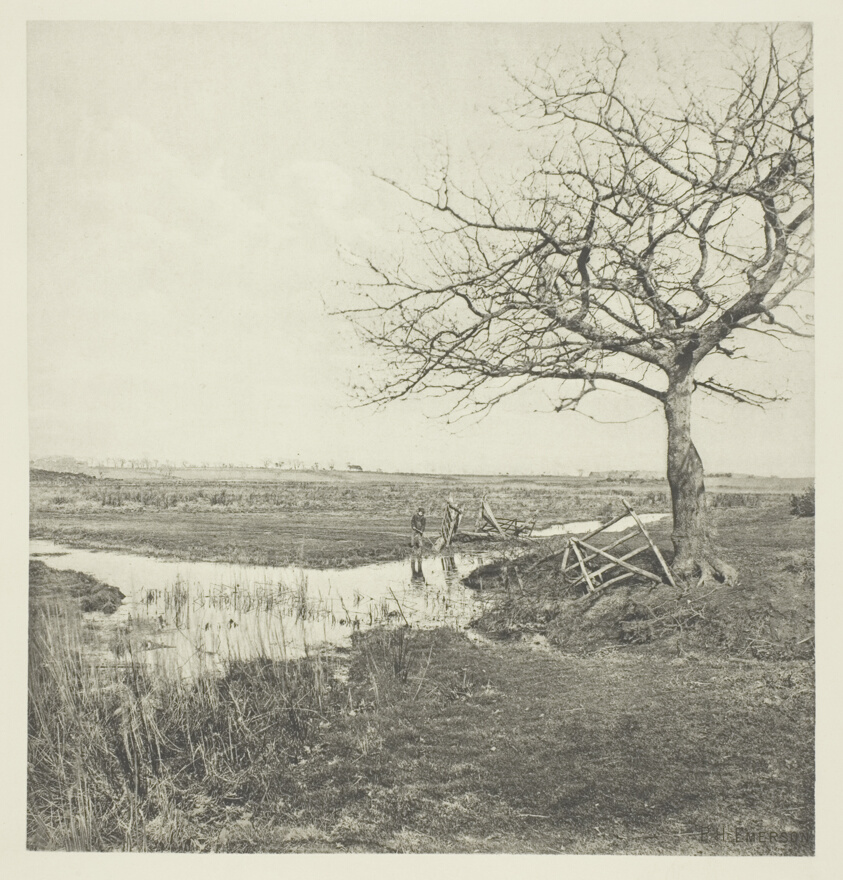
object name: Photograph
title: Leafless March (Suffolk)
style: 19th century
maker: Peter Henry Emerson (English, born Cuba, 1856–1936)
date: 1878/87, printed 1888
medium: Photogravure, pl. III from the album "Pictures of East Anglian Life" (1888)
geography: England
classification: photogravure; photomechanical process; photography; photograph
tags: Collected by Hugh Edwards, Pictures of East Anglian Life, Seat of War in the Crimea